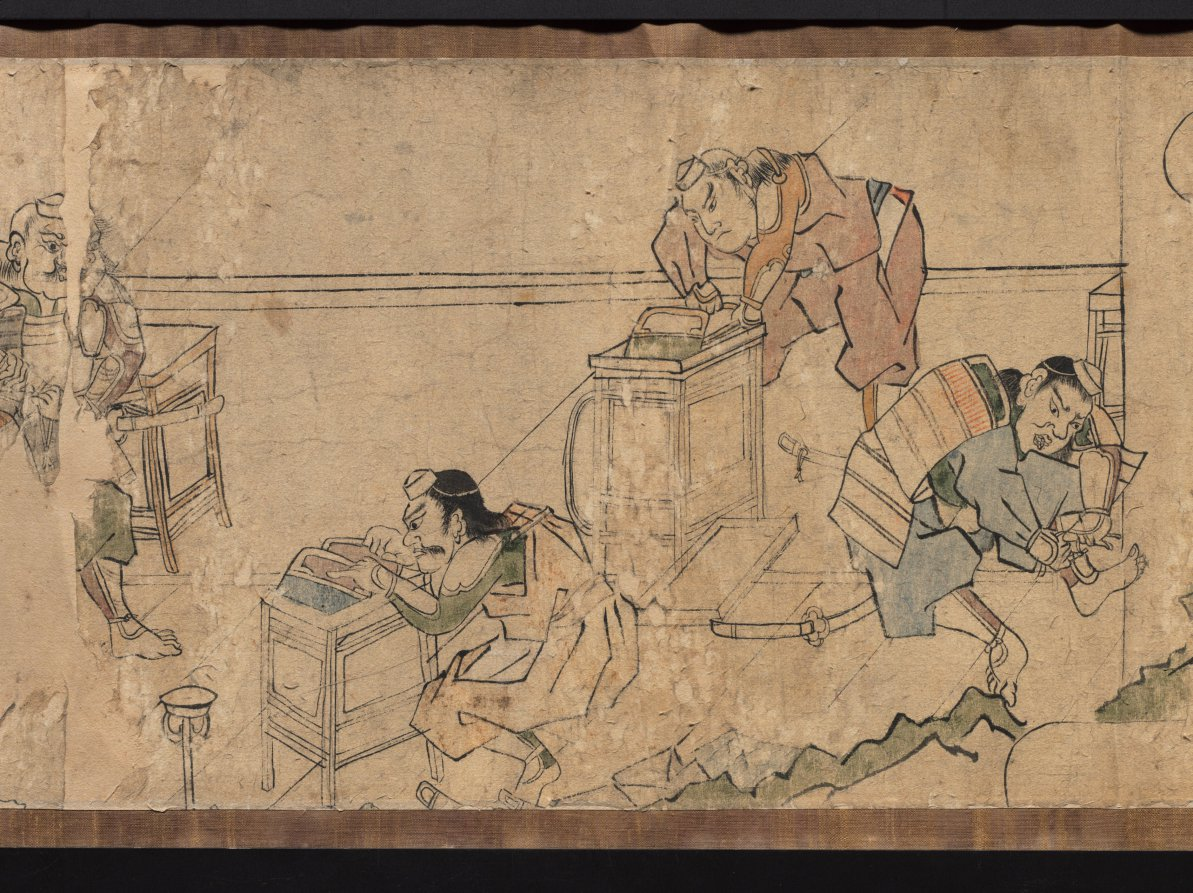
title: Oeyama Engi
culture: Japan, Edo period (1615–1868)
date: 1615–1868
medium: one of a pair of handscrolls; ink and color on paper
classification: Painting